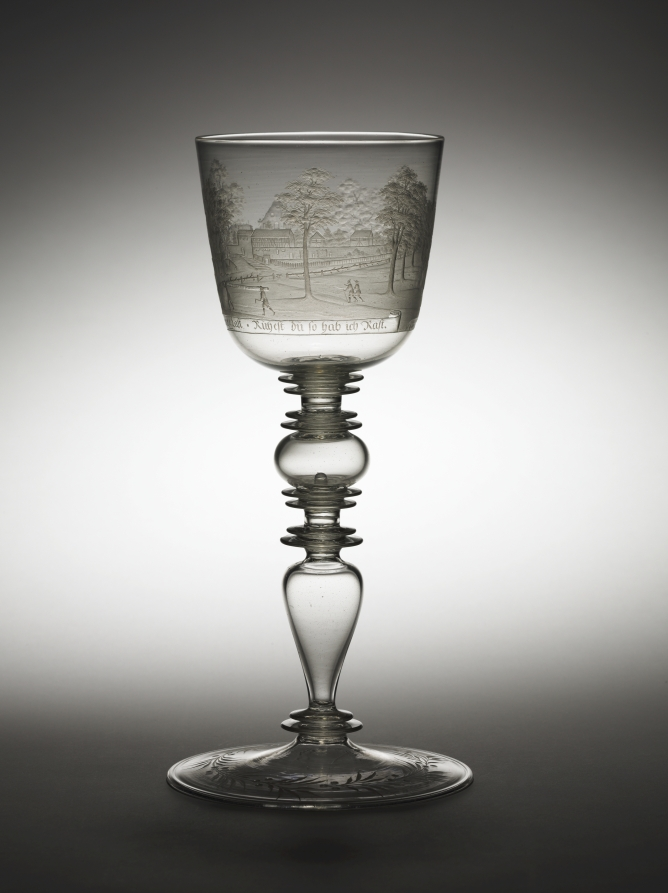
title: Goblet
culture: Bohemia, 17th century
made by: Hermann Schwinger (German, 1640–1683)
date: c. 1680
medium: glass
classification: Glass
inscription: signed and dated. Two inscriptions, one appears on the log held by two men: Es Ruhet auf beiden (It rests on both); the other appears below the scene: Deine Last ist meine Last. Ruhert du so habe ich Rast (Your burden is my burden. It you rest then so have I rest).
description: View of the Panierplatz in Nuremberg, and Allegory.